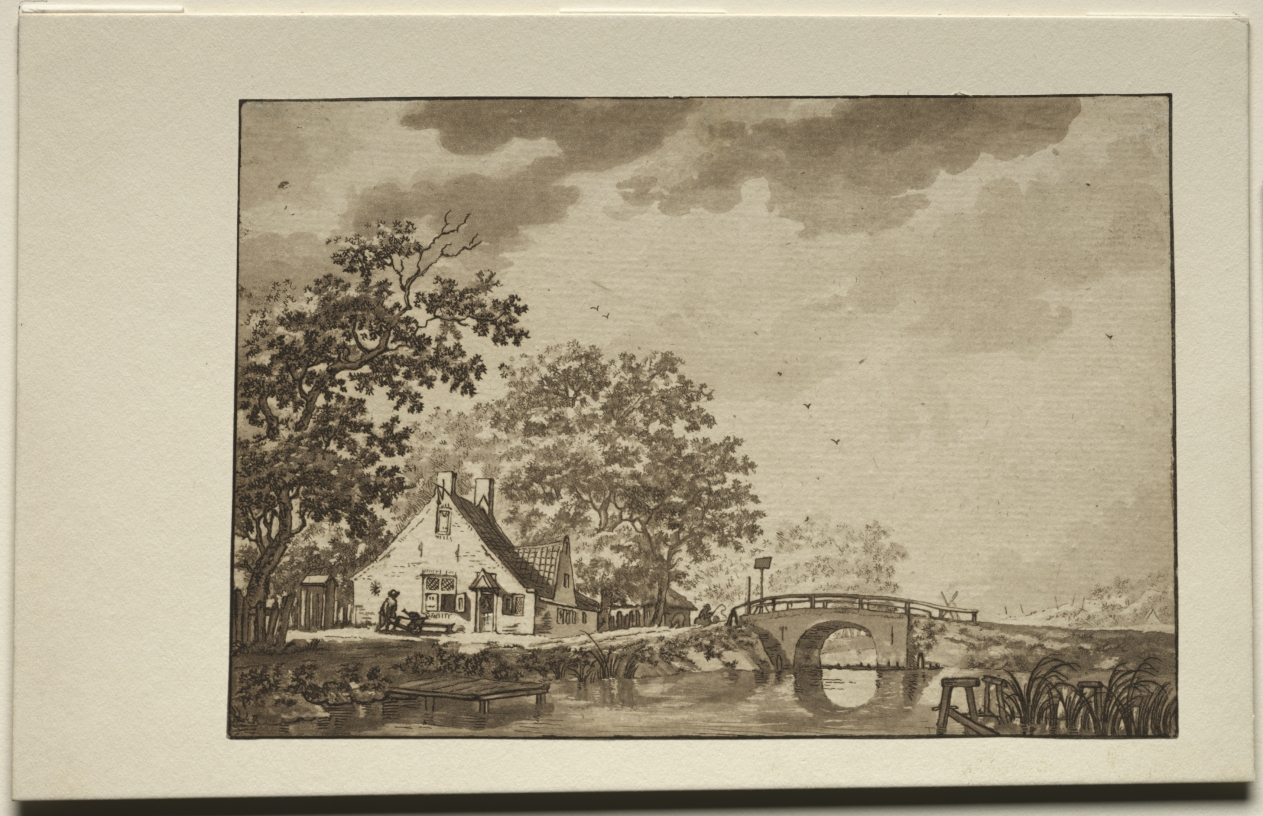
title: Landscape with Cottage and Bridge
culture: Netherlands(?), 18th century (?)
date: 1700s?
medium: etching and aquatint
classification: Print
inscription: by Louise Richards, on secondary support, VERSO, lower left, in graphite: Anon. after Jacob Cats?